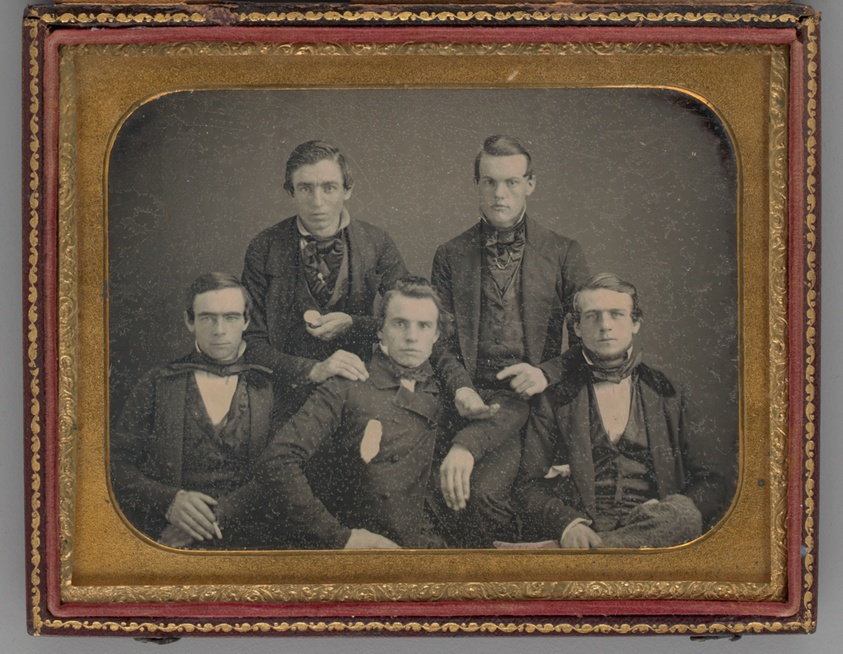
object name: Photograph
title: Untitled (Portrait of Five Men)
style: 19th century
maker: Unknown maker; American, 19th century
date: 1855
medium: Daguerreotype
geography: United States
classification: portrait; photograph; photographic process; photography; portrait; daguerreotype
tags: lundberg collection, portraits: multiple subjects, portraits: male subject, portrait, Male, portraits